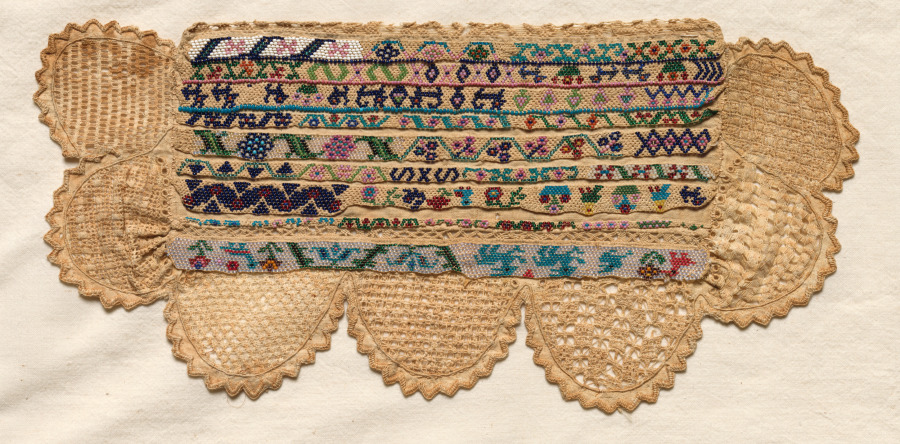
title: Sampler Fragment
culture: Mexico, 19th century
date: 1800s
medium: embroidery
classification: Sampler